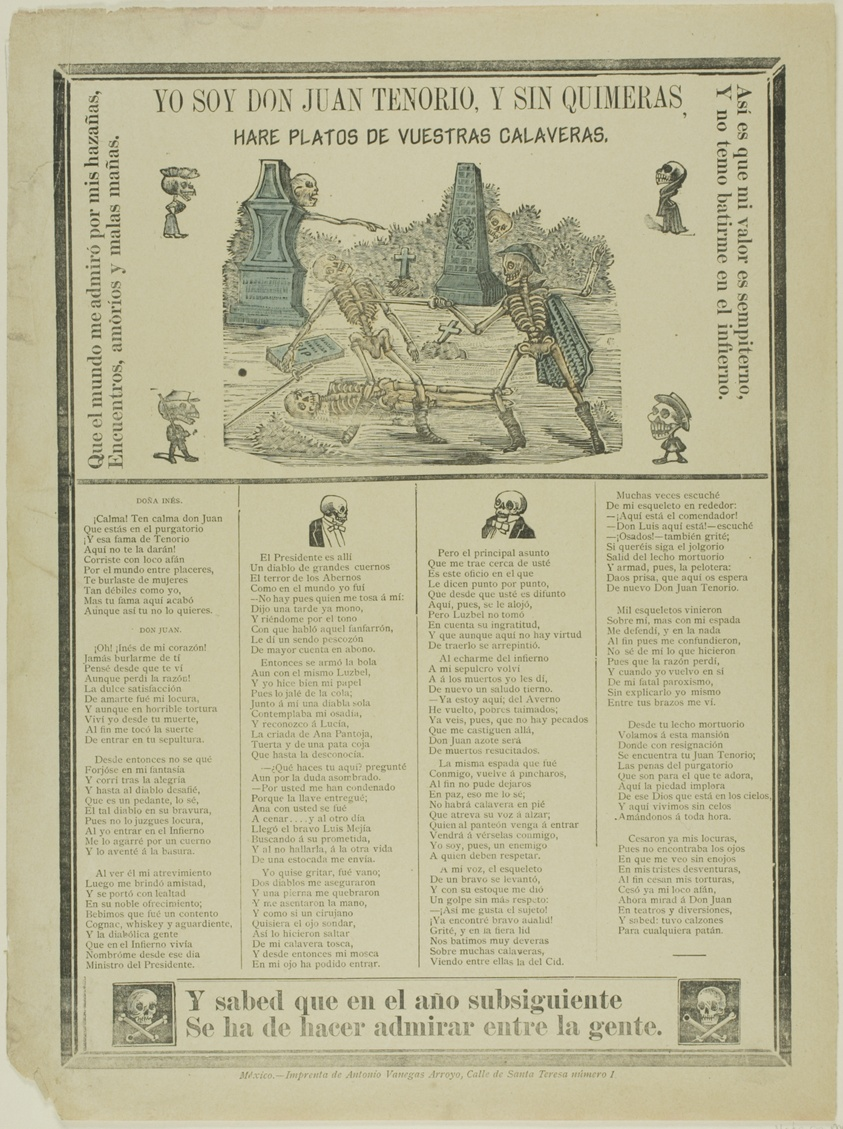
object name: Print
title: I Am Don Juan Tenorio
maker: Manuel Manilla (Mexican, 1830-c.1900)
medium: Relief engraving on typemetal on paper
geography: Mexico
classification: relief etching; print; prints and drawing